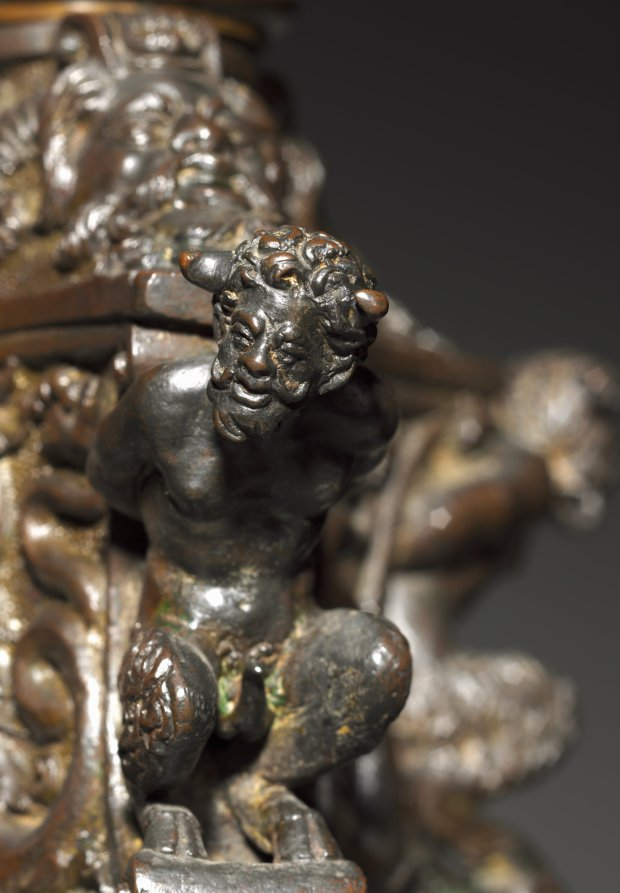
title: Paschal Candlestick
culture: Northern Italy, possibly Padua, 16th century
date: c. 1525–1550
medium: bronze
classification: Sculpture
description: In Roman Catholic practice, a large candlestick holds the Paschal Candle, blessed and lit for the first time on Easter eve, then used on significant occasions throughout the year. Despite its religious function, the decorations here are entirely secular-ranging from panthers and bound satyrs to the heads of raptors and goats. These elements derive from ancient Roman sculpture and were especially popular among intellectuals in northern Italy, who were actively exploring connections among pagan traditions, ancient philosophy, and Christianity.